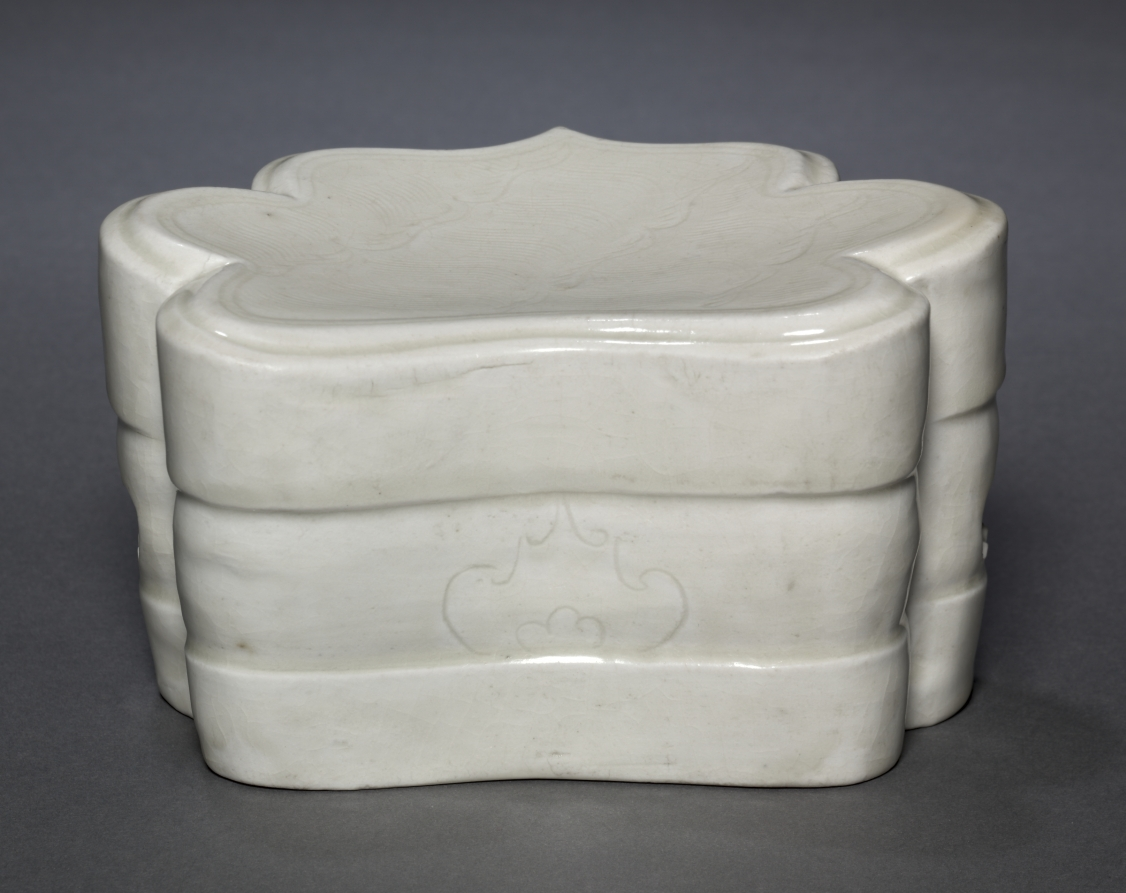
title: Cloud-Collar Pillow with Waves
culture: China, Jiangxi Province, Northern Song dynasty (960–1127)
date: 1000s–1100s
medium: glazed porcelain with incised and carved decoration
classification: Ceramic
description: This ceramic pillow in the form of a cloud—a design pattern variously referred to as ruyi, the shape of a head of an auspicious scepter—is a fine example of qingbai ware from Jiangxi province. It has a pure white body covered with a transparent, glassy glaze that carries a faint greenish tinge, thus giving it another name, yingqing, or "shadow blue." On the surface of the pillow is a carved and incised design of repeating wave patterns. The beauty of this piece lies in its elegance of form, simplicity of design, and delicacy of workmanship.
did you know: While ceramic might not be your choice for a pillow, it actually kept the user cool as they slept.